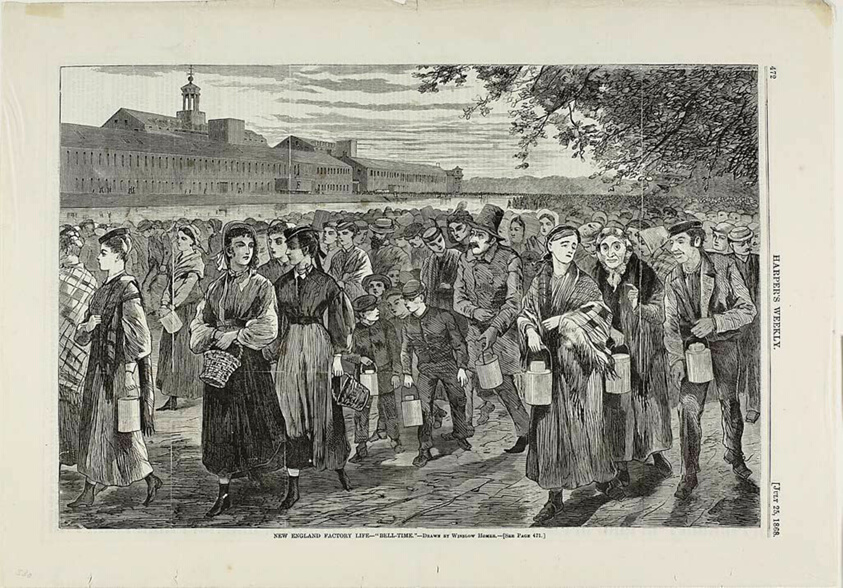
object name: Print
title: New England Factory Life—"Bell Time"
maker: Winslow Homer (American, 1836-1910); published by Harper's Weekly (American, 1857-1916)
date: published July 25, 1868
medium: Wood engraving on paper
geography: United States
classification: wood engraving; print; prints and drawing